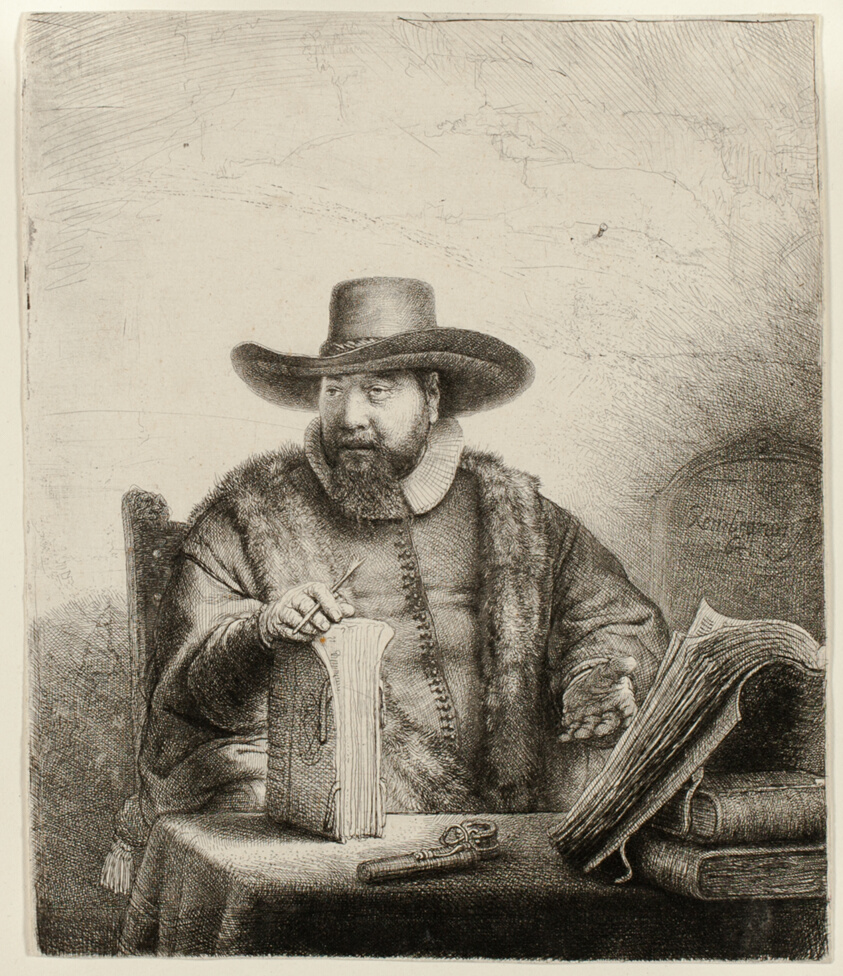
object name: Print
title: Cornelis Claesz. Anslo, Preacher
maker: Rembrandt van Rijn (Dutch, 1606-1669)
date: 1641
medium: Etching and drypoint in black on cream laid paper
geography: Holland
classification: etching; print; prints and drawing; paper; drypoint